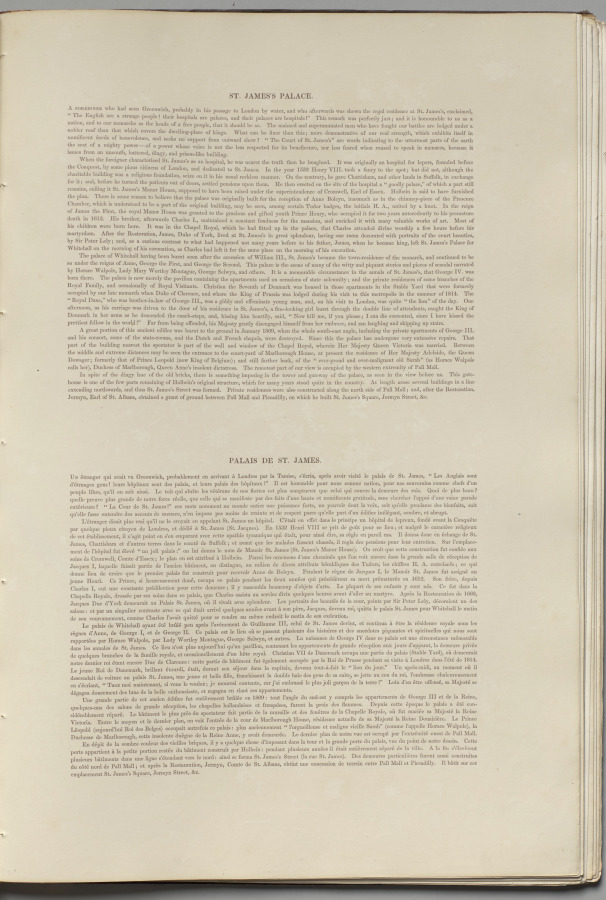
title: London As It Is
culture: England, 19th century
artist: Thomas Shotter Boys (British, 1803–1874)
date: 1842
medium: lithograph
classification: Bound Volume